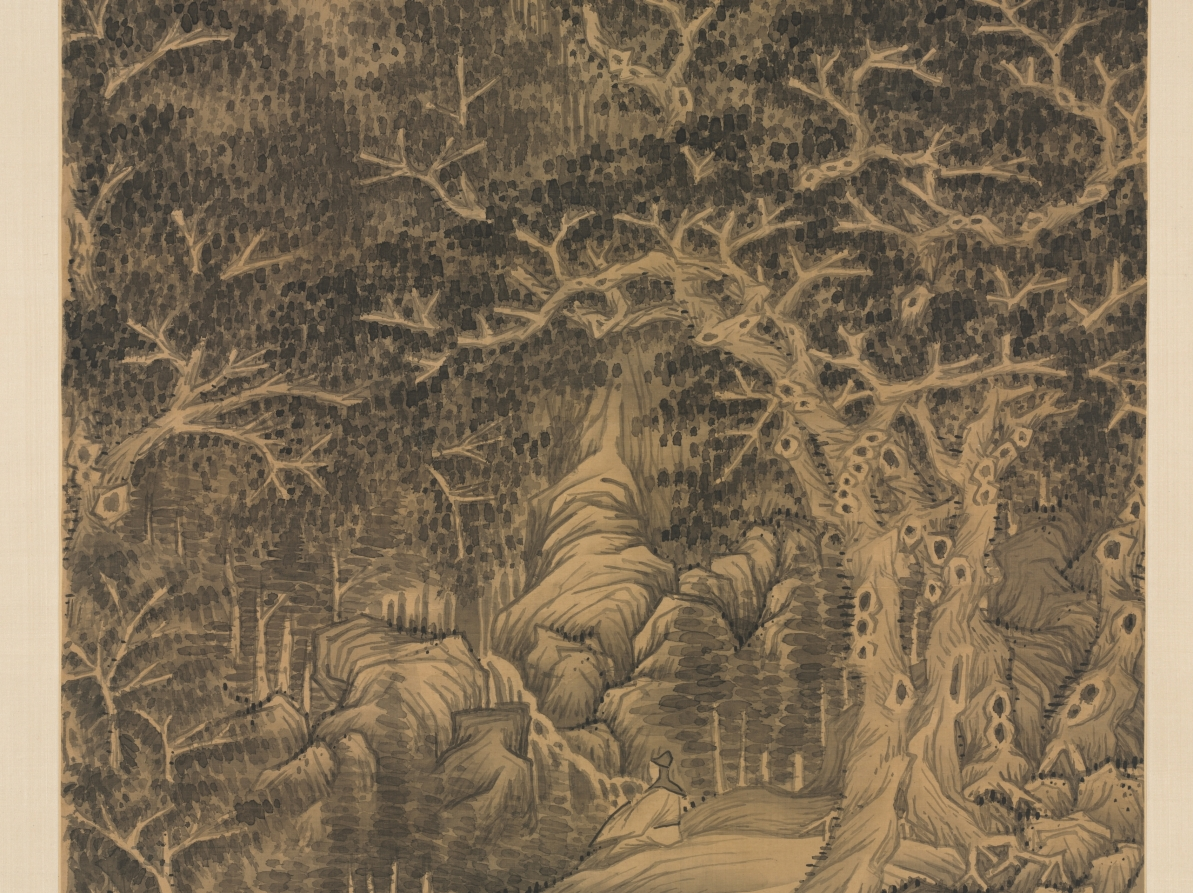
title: The Mountain of Five Cataracts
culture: China, Ming dynasty (1368–1644)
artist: Chen Hongshou (Chinese, 1598/99–1652)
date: c. 1630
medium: hanging scroll; ink on silk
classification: Painting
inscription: Artist's signature and seal at middle right edge: Hongshou [seal] Zhanghou 洪绶 [印]章侯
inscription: Inscription by Gao Shiqi 高士奇 (1645–1704): The Mountain of the Five Cataracts is bordered by three prefectures--Wu [Jinhua], Hang [Hangzhou], and Yue [Shaoxing]--and is quite close to Jiyang [Zhuji] in Yue. The landscape there is extraordinary and precipitous, with ridges and peaks standing in circles. Rocks of strange shapes gaze down everywhere, while maple and bamboo provide shade. The water from five pools overflows and is suspended in five steps--that is why it is called "Five Cataracts." Xie Yuanqing [Xie Tiao 謝朓, c. 464–499] of the Qi Dynasty gathered medicinal herbs here; Diao Jingchun [Diao yue 刁約, 11th century] of the Song Dynasty also visited here; Song Jinhua [Song Lian 宋濂, 1310–1381] and Xu Tianchi [Xu Wei 徐渭, 1521–1593] both wrote travel notes about the place; and Chen Hongshou painted here. His mountains are done in the style of the Six Dynasties masters; the trees are after those of Dong Beiyuan [董源 Dong Yuan, active during the Five Dynasties]--the painting seems to be richly imbued with the primeval spirit. Xu Wei said that the grotto is unique for the shade (yin) and the five cataracts unusual for the sun (yang). There are seventy-two peaks, with a ravine between two cliffs. At times they are bright and at other times, gloomy; sometimes they seem to be open, sometimes closed, yet often border uniquely between shady (yin) and sunny (yang). Zhanghou [Chen Hongshou] really succeeded in capturing that spirit. As a young man indulgently boating through Shanyin [Shaoxing],/ I became familiar with the beauty of the Five Cataracts./ The cold streams, when level, become pools clear as crystal./ Pouring foam mingled with flying waterfall,/ Its shapes constantly changing./ Water would flow downward without a sound,/ Or become raging billows emitting echoes./ Sometimes the wind from the sky would wail,/ The green forest during the day would turn dark./ Sometimes it was dangerous and difficult to ascend,/ For the moss was slippery on the stone steps in those precipitous cliffs./ After reading the travel notes of Sung [Lian] and Xu [Wei],/ I'm afraid their descriptions are incomplete. / Yet when Laolian [Chen Hongshou] was seized with the inspiration to paint,/ His brush and ink moved with exhilaration./ It is as if mists have risen/ From a hot cooking pot, gradually opened./ By hanging this on a plain wall,/ One can clearly listen to the quiet night./ At the end of the year, ice and snow are deep;/ The cold air in the quiet studio is frozen./ Near the fireplace, I make with it a silent, spiritual acquaintance/ Burning incense and striking a lucid qing [stone chime]. On the eighteenth day of the twelfth month in the jimao year of the Kangxi era [1699]. Jiangcun, Gao Shiqi. Zhuchuang inscribed this at Zhe in the Lan Jing studio. It was the third day after the beginning of spring. trans. LYSL/HK/WKH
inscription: Collector's inscription by Gao Shiqi 高士奇 (1645–1704), one column in standard script at the lower left corner: 信天巢秘藏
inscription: 5 seals of Gao Shiqi 高士奇 (1645–1704): 竹窗 Zhu Chuang; 高士奇 Gao Shiqi; 澹人 Danren; 簡靜齋 Jian Jing Zhai (Gao Shiqi's studio; at the upper left corner); 高氏江村草堂珍藏書畫之印 Gaoshi Jiangcun Caotang Zhencang shuhua zhi yin (at the lower left corner).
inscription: Two additional seals at the lower left and right corners are undecipherable.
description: A unique landscape painting in the existing body of Chen Hongshou’s art, this painting reveals his involvement with the practice of fang (imitation) to achieve creative transformation. Chen acquired the tradition stemming from Dong Yuan of the Five Dynasties, with which he sought an artistic individuality that lends his work an idiosyncratic vision and extraordinary power.